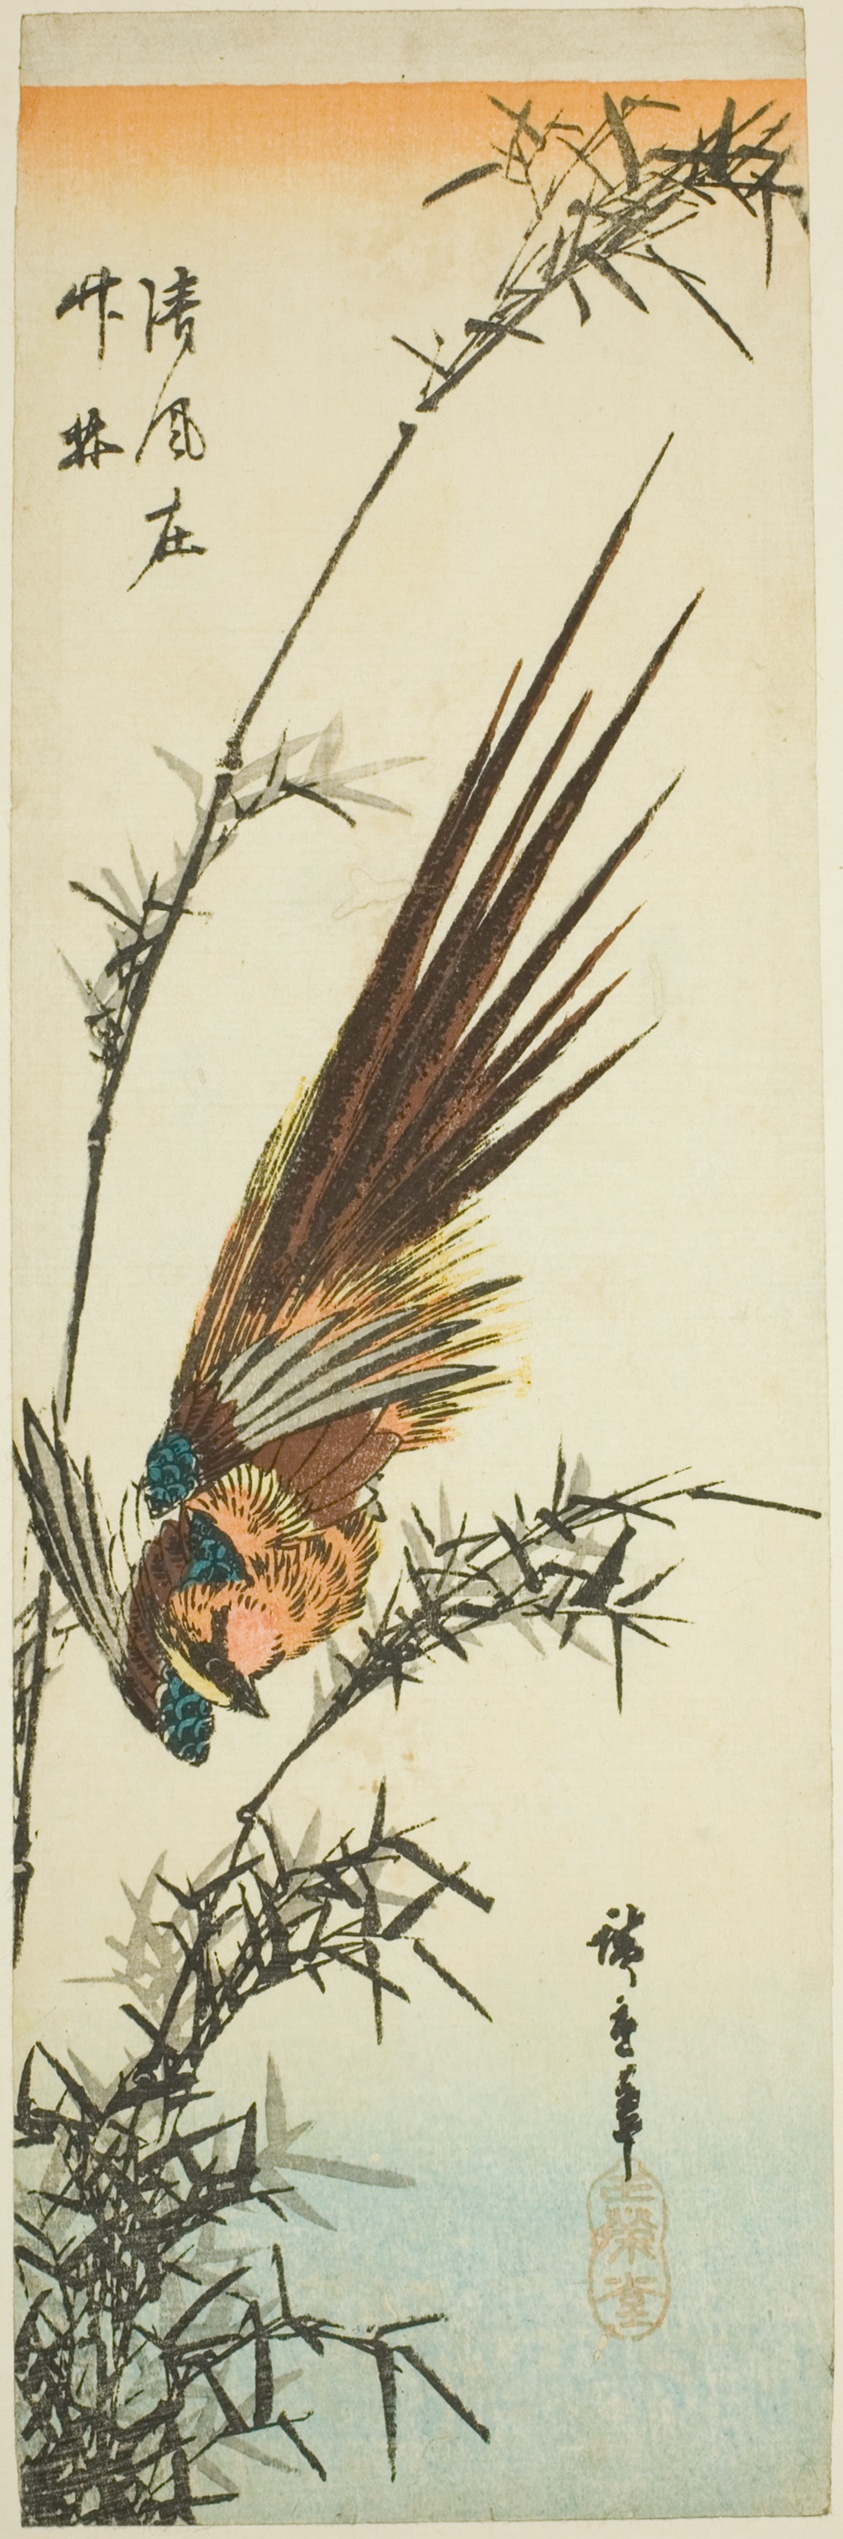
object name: Print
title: Pheasant and bamboo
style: Japanese (culture or style)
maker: Utagawa Hiroshige 歌川 広重; Japanese, 1797-1858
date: 1840s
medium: Color woodblock print; aitanzaku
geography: Japan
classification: woodblock print; print; asian art